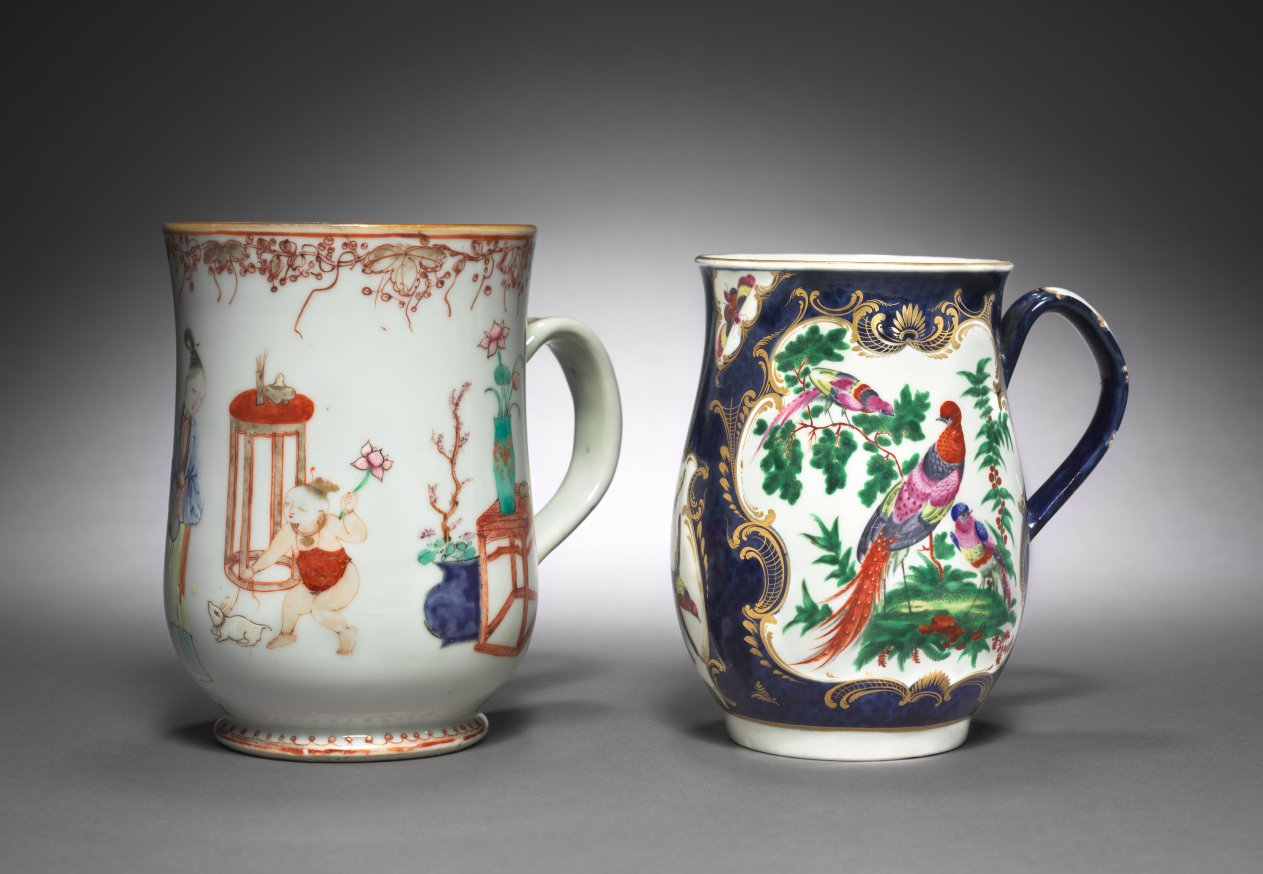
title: Tankard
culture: England, 18th century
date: c. 1770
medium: ceramic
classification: Ceramic